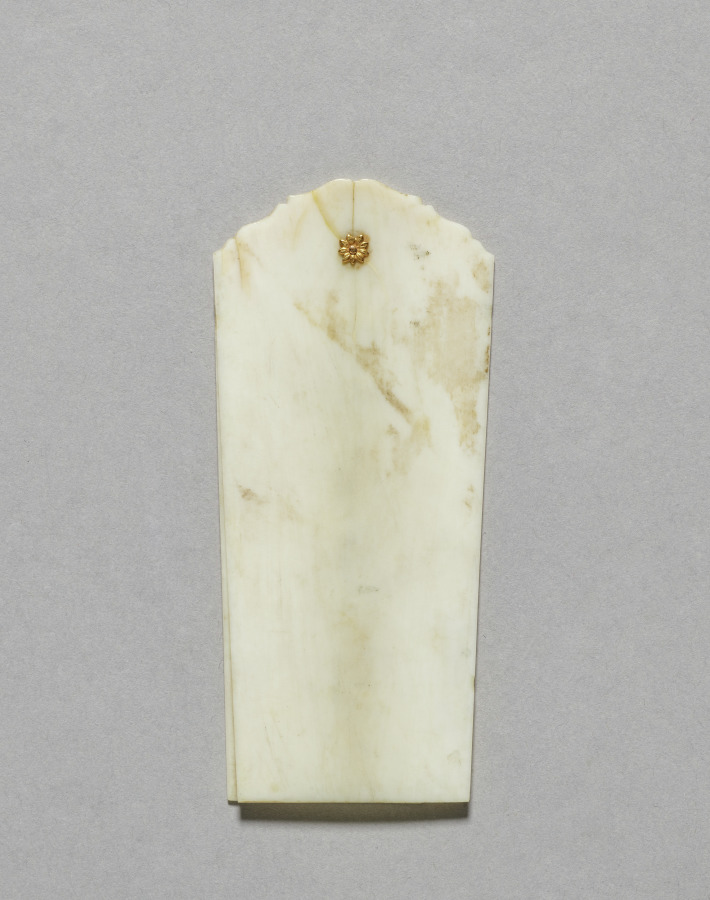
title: Note tablet from a Sewing Box (Nécessaire)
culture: Austria, possibly Vienna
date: c. 1765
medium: gold and mother-of-pearl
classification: Miscellaneous